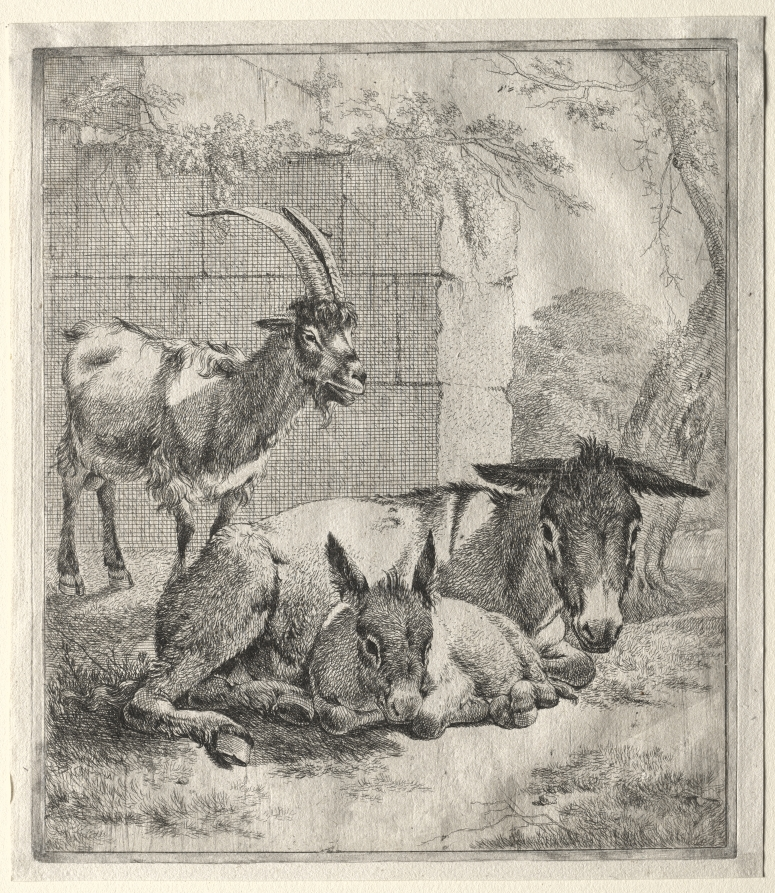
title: Goat and Donkeys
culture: Germany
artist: Johann Heinrich Roos (German, 1631–1685)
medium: etching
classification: Print